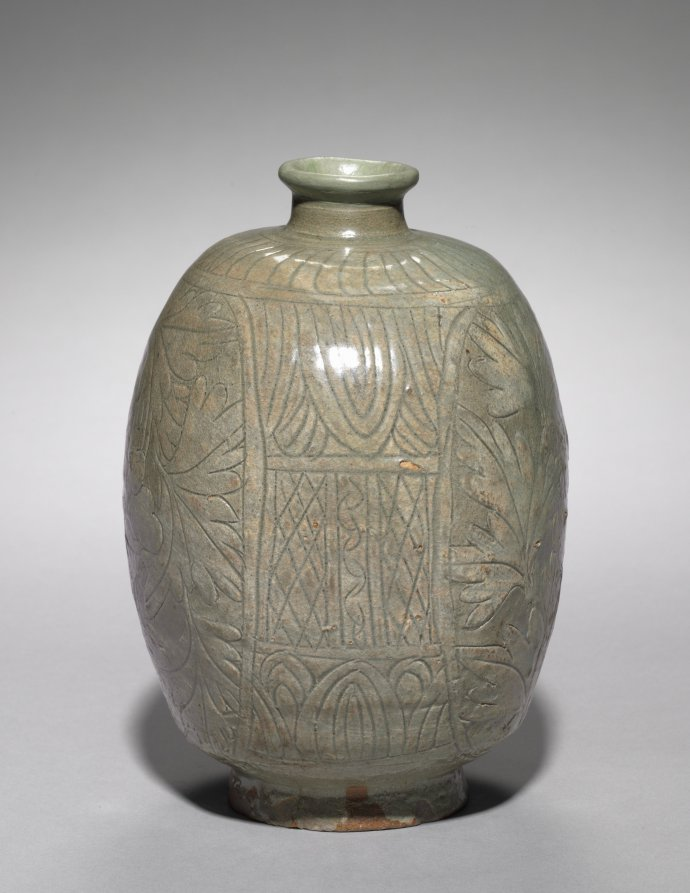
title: Wine Flask with Incised and Sgraffito Peony Design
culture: Korea, Joseon dynasty (1392–1910)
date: 1500s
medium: stoneware with incised design (Buncheong ware)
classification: Ceramic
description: Produced in both central and provincial kilns during during the 1400s–1500s, buncheong (literally means "powdered green"), like this wine flask commonly feature gray-green glaze due to the usage of less processed and refined clay high in iron. Many experimental techniques such as white slip, inlay, stamping, and incising, which had been explored and perfected in the Goryeo period, were also adopted for buncheong pottery. The artist for this work extensively used the incising technique to draw both floral and abstract patterns.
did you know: The term buncheong, which refers to this type of pottery, means "powdered gray-green glazed ceramics.”